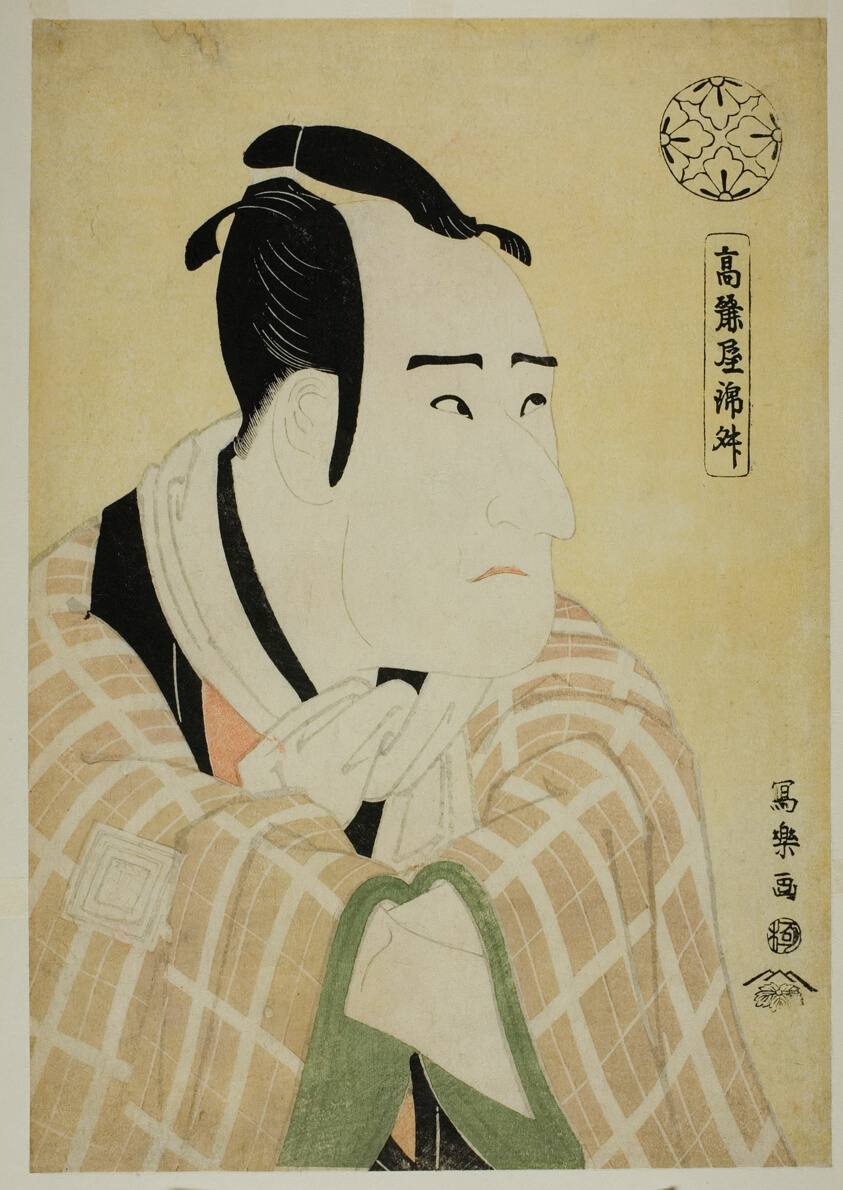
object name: Print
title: Koraiya Kinsho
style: Japanese (culture or style)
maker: Toshusai Sharaku 東洲斎 写楽; Japanese, active 1794-95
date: 1794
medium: Color woodblock print; aiban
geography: Japan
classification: woodblock print; print; asian art